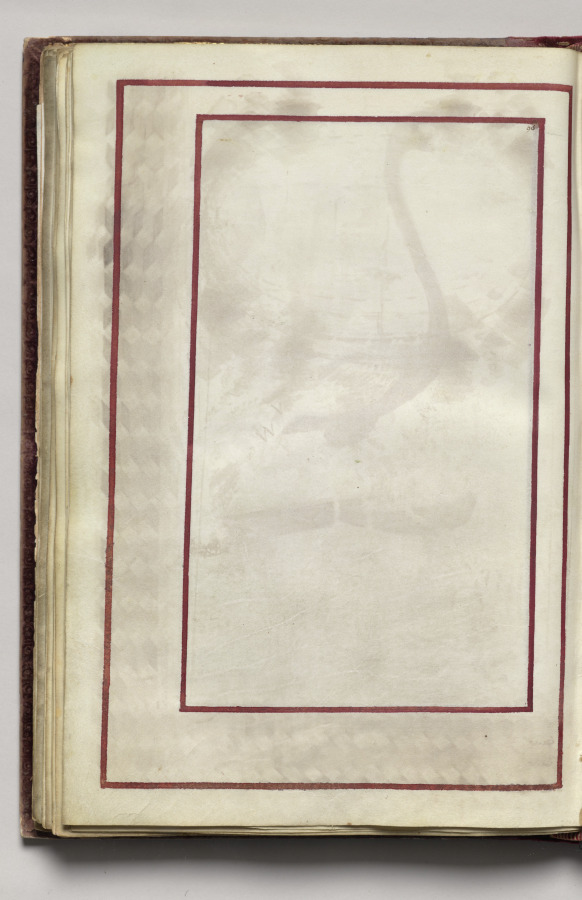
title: Border, folio 42 (verso), from Florilegium (A Book of Flower Studies)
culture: France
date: 1608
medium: watercolor, ink, silver and gold over occasional traces of pencil, on vellum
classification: Bound Volume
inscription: Dated: Poitiers 1608 (on frontispiece) Signed: On frontispiece in black ink, lower right: Van Kuyk Notation on drawing: Frontispiece: in pencil, lower margin: * élève de Van Kessel, peintre flammand (* in pencil also appears in front of Van Kuyk's name).